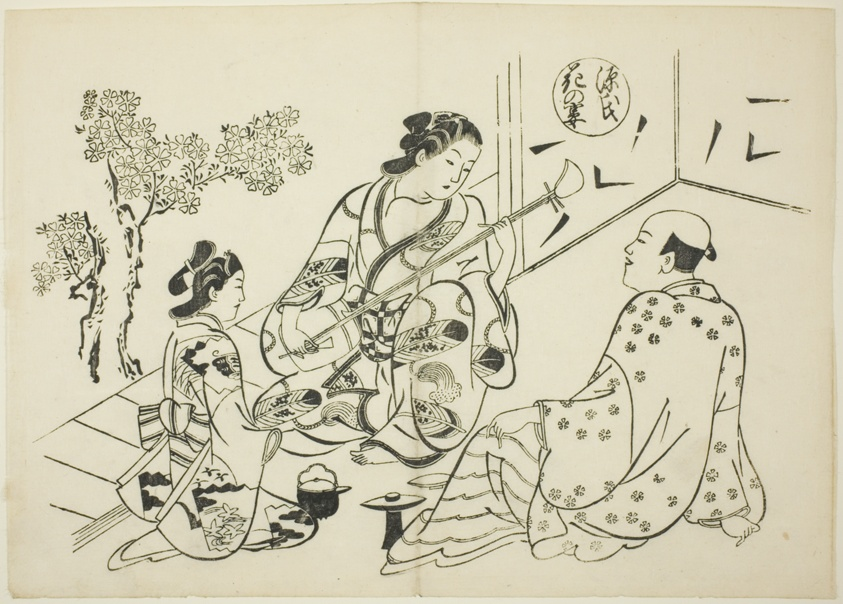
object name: Print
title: The Hana-no-en Chapter from "The Tale of Genji" (Genji Hana-no-en), from a series of Genji parodies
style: Japanese (culture or style)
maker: Okumura Masanobu (Japanese, 1686-1764)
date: c. 1710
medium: Woodblock print; oban, sumizuri-e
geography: Japan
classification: woodblock print; print; asian art; woodblock